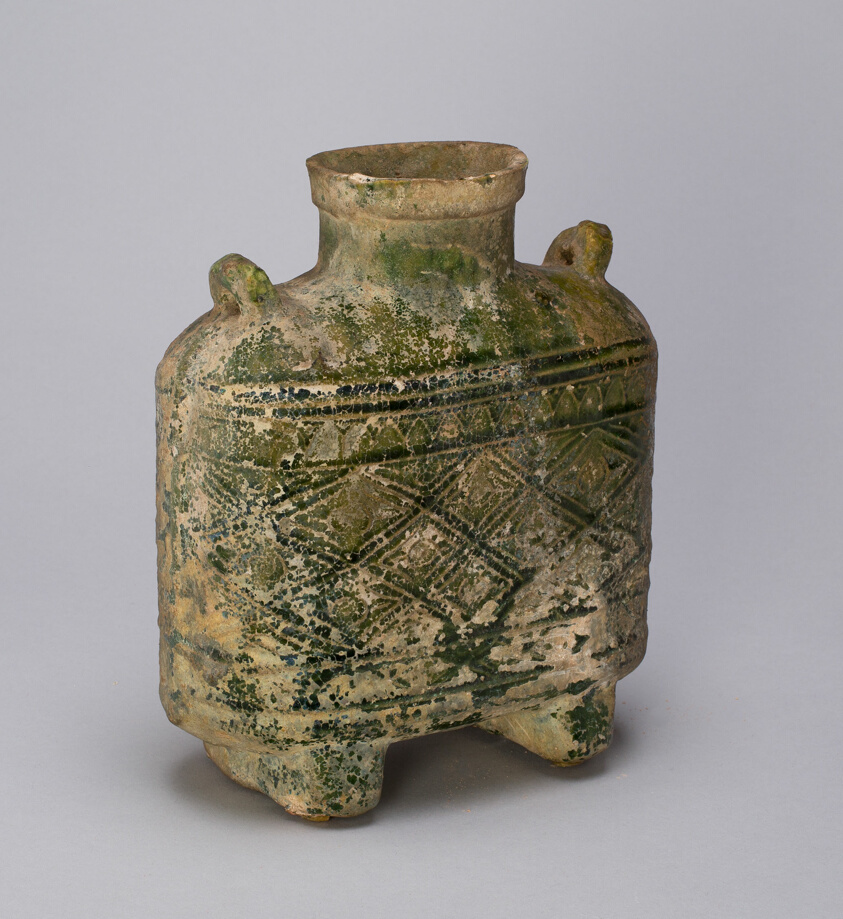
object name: Vessel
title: Rectangular Bottle with Loop Handles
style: Chinese (culture or style)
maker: China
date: Eastern Han dynasty (A.D. 25–220)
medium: Earthenware with lead green glaze and underglaze molded and incised decoration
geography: China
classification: ceramics; asian art; vessel